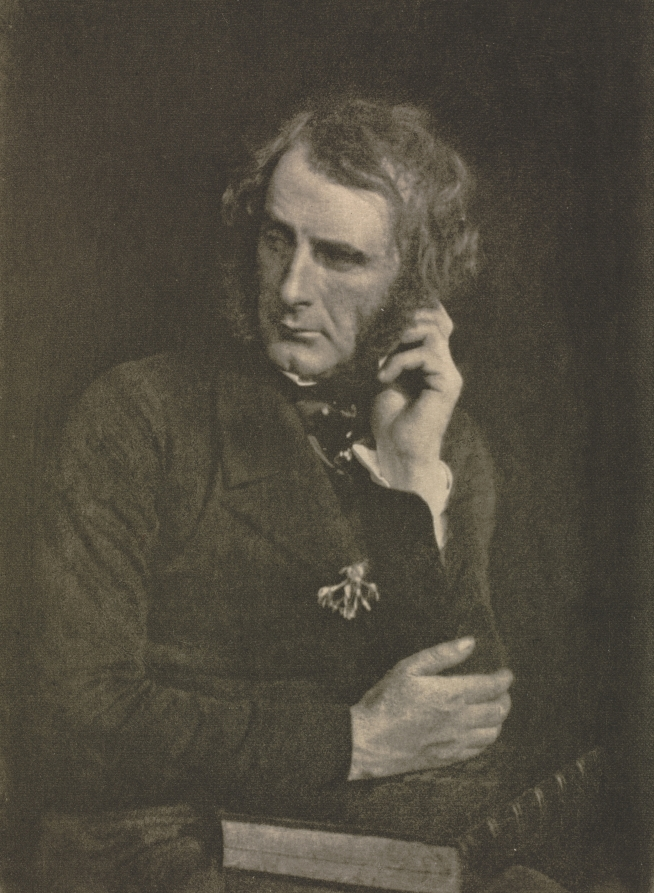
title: Camera Work: Sir Francis Grant, P.R.A.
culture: England, 20th century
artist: David Octavius Hill (British, 1802–1870)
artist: and Robert Adamson (British, 1821–1848)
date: 1912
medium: photogravure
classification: Bound Volume